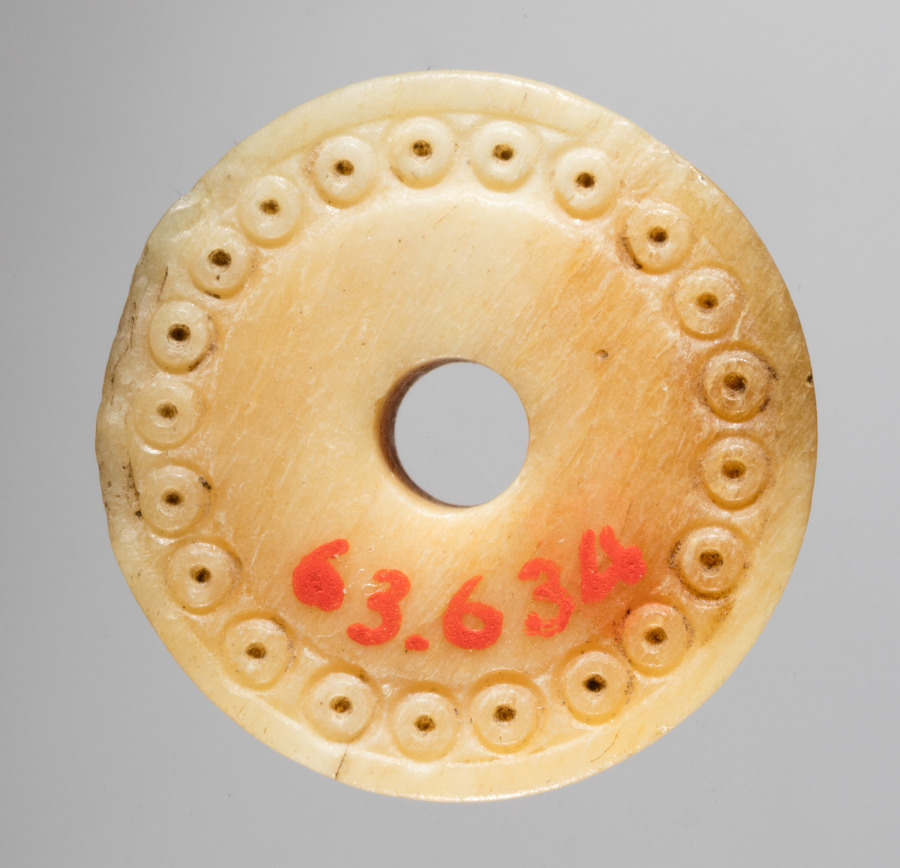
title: Spindle Whorl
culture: Iran, early Islamic period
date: 700s - 900s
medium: bone, incised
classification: Spindle Whorl